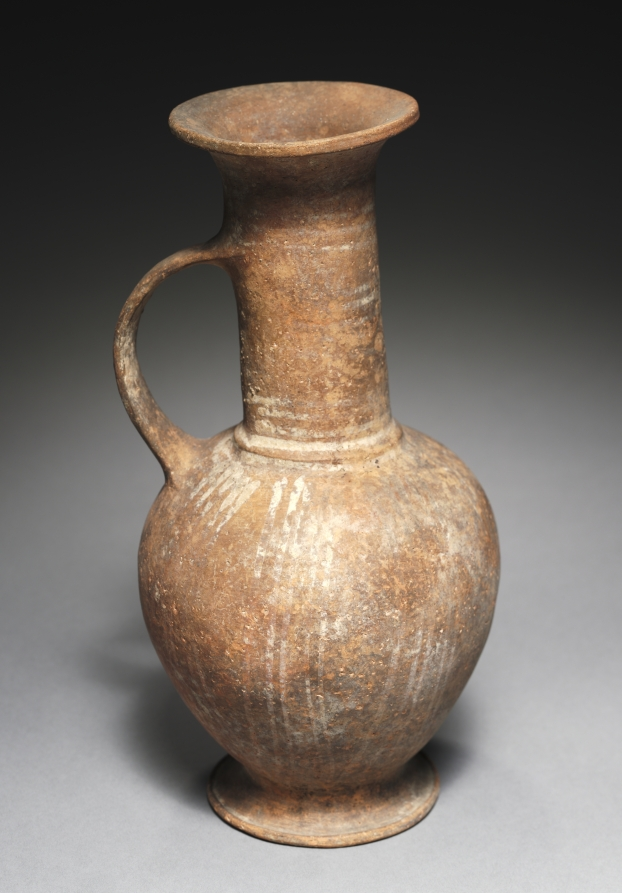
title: Jug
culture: Cyprus, late Cypriot II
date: c. 1450–1200 BCE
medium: base-ring ware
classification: Ceramic